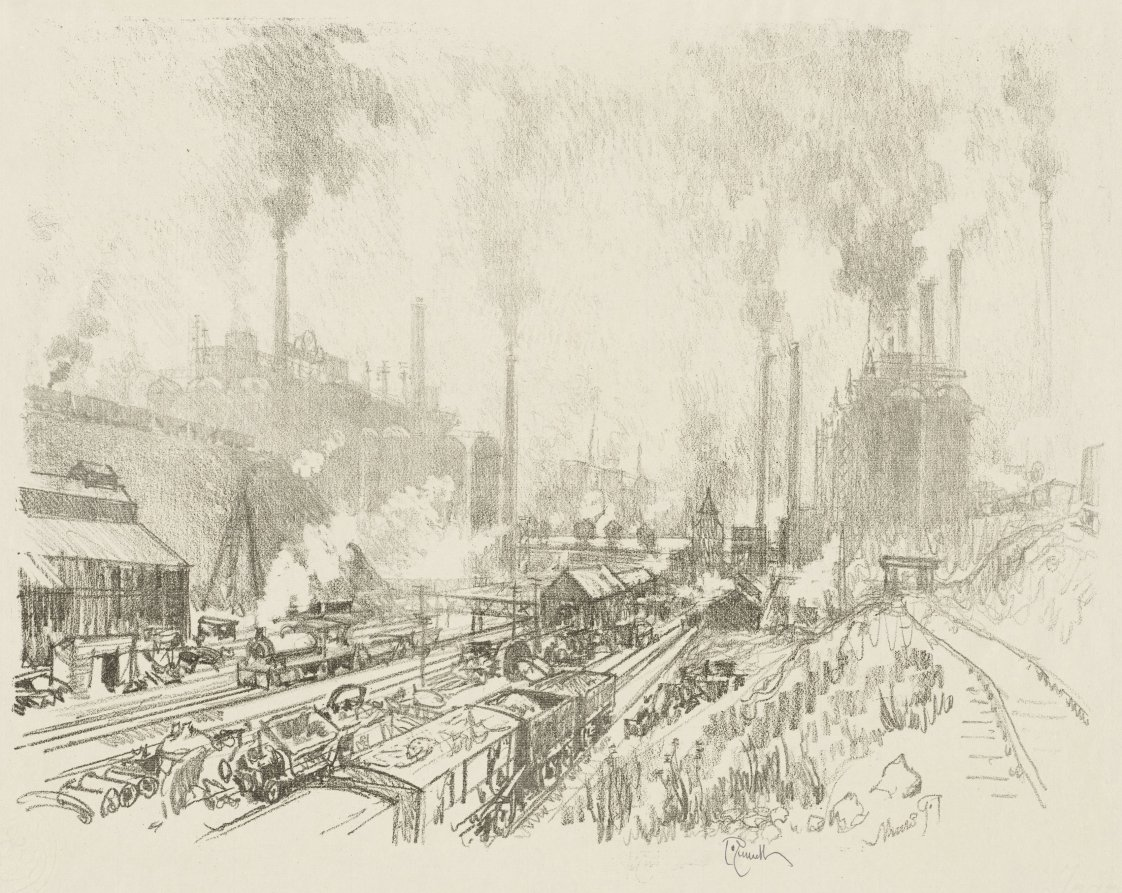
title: English War Work: In the Land of Iron and Steel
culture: America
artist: Joseph Pennell (American, 1857–1926)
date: 1916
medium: lithograph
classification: Print